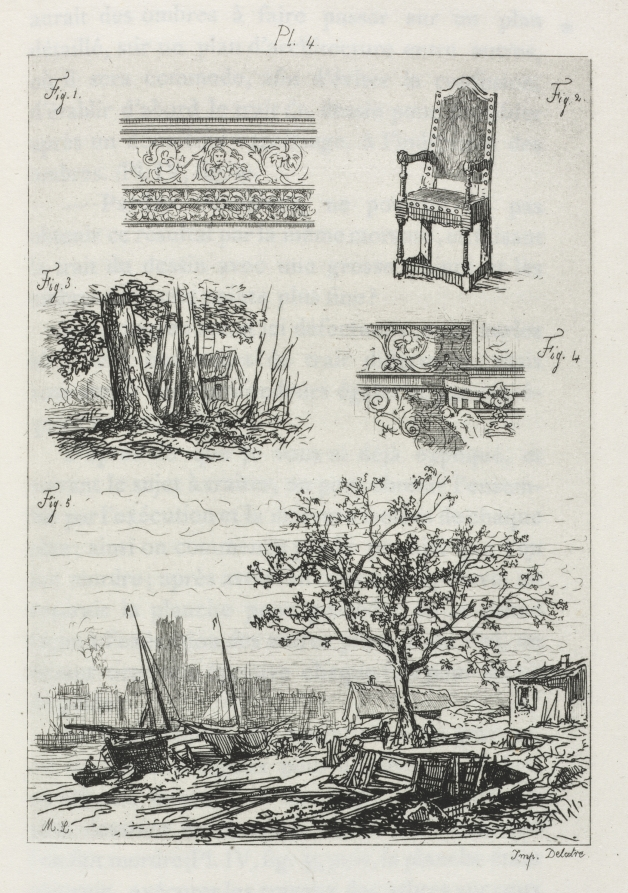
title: Traité de La Gravure a l’eau forte: Plate 4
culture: France, 19th century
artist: Maxime Lalanne (French, 1827–1886)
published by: Cadar and Luquet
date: 1866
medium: etching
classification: Bound Volume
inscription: on first page, in pencil: "J. H. Maghee 1874"